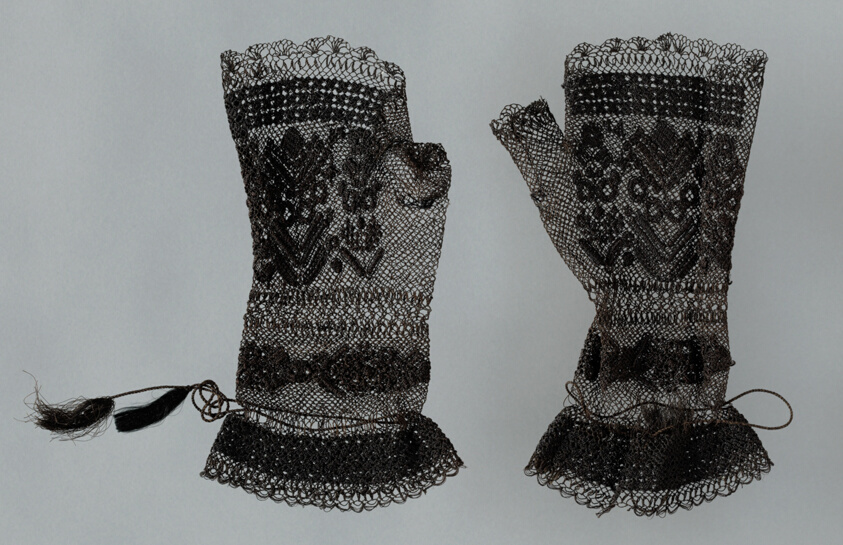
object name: Textile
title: Pair of Mittens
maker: England or France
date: c. 1850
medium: Silk, bands of bunch, spider, and square netting; embroidered in cloth and overcast stitches; cotton cords with silk cut tassels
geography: England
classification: textile; needlework (visual works)